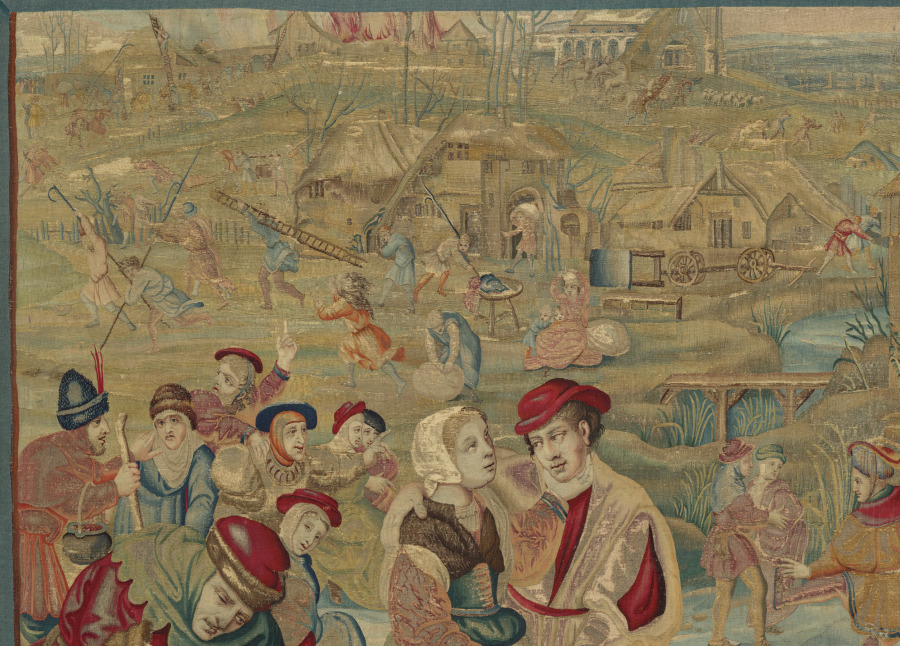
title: Winter: Skating Scene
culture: France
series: Four Seasons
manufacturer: possibly by Gobelins Manufactory (France, Paris, est. 1662)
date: designed c. 1535, woven mid- to late 1600s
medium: Wool, silk, and gold filé: tapestry weave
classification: Tapestry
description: People of all classes and ages enjoyed ice skating, a winter pastime popularized in the Netherlands. Here, some couples are already skating and slipping on the ice, while others tie on their skates or huddle around braziers (portable coal heaters) to keep warm. One affectionate couple in the foreground hold hands as they walk. A castle on the far edge of the frozen lake occupies the background. In the left distance, several small figures holding ladders and long hooks run toward a building that has caught on fire, a frequent occurrence in the winter when wooden houses were heated by fireplaces.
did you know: If you look closely you can see that the top edge of this scene is missing; look at the top of the castle on the right or the forest fire on the left.